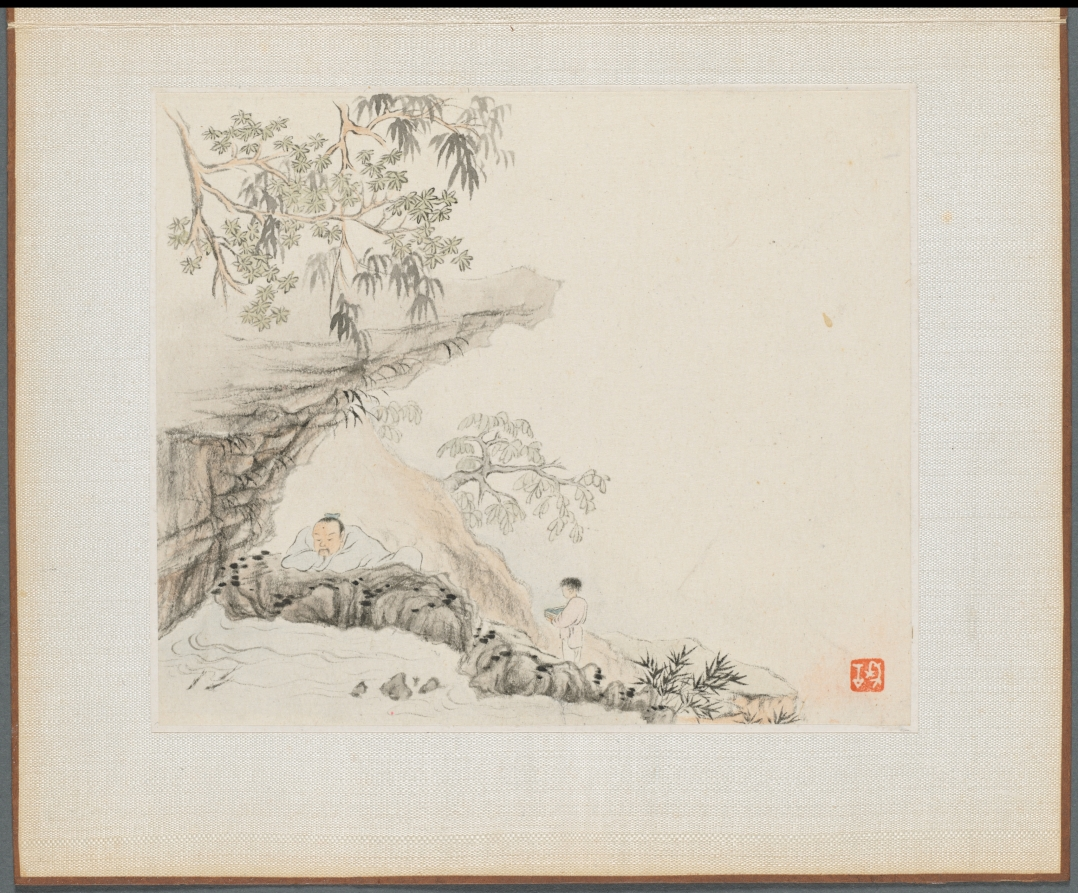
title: Album of Landscape Paintings Illustrating Old Poems: Scholar watching Fish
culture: China, Qing dynasty (1644-1911)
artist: Hua Yan (Chinese, 1682–c. 1765)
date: 1745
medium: album leaf, ink and light color on paper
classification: Painting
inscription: Seal lower right corner